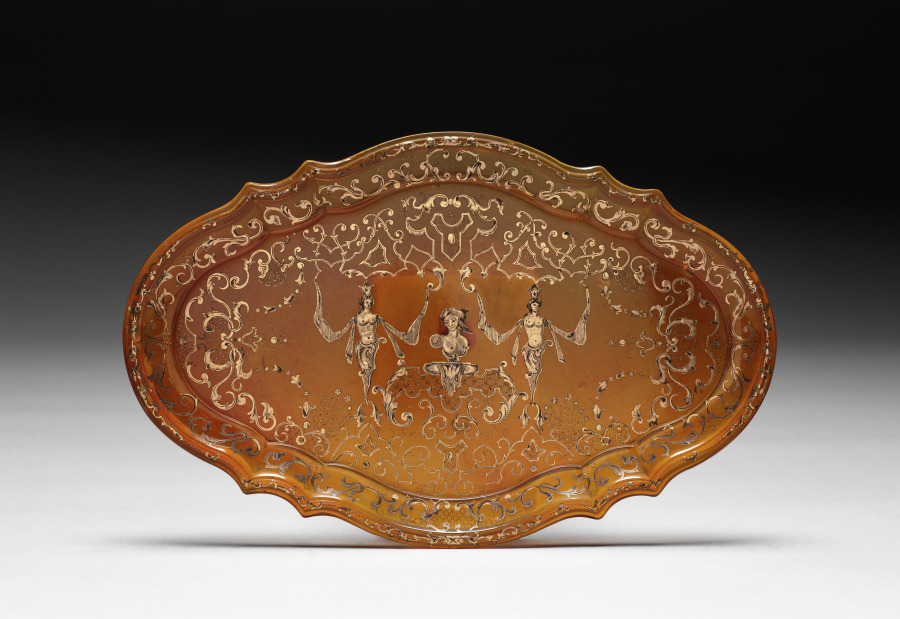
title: Tray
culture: France, 18th century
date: c. 1750 (?)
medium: amber decorated with inlaid gold and mother-of-pearl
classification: Miscellaneous